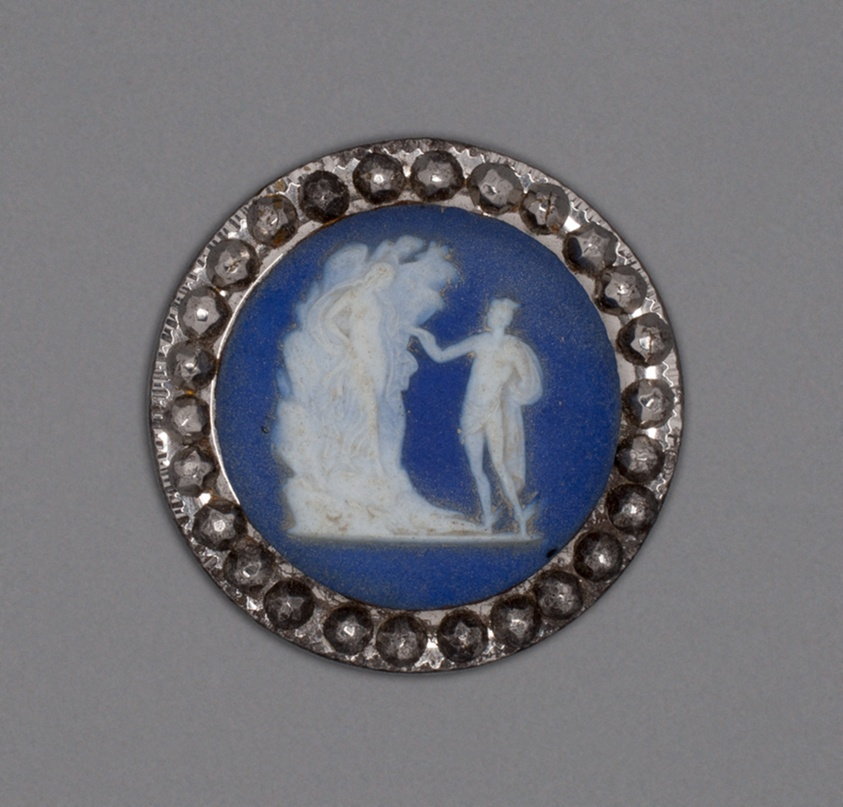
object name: Ceramics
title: Button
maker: Wedgwood Manufactory (England, founded 1759)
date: Late 18th century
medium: Stoneware (jasperware)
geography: Burslem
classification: accessories (object genre); stoneware; european decorative arts; ceramics